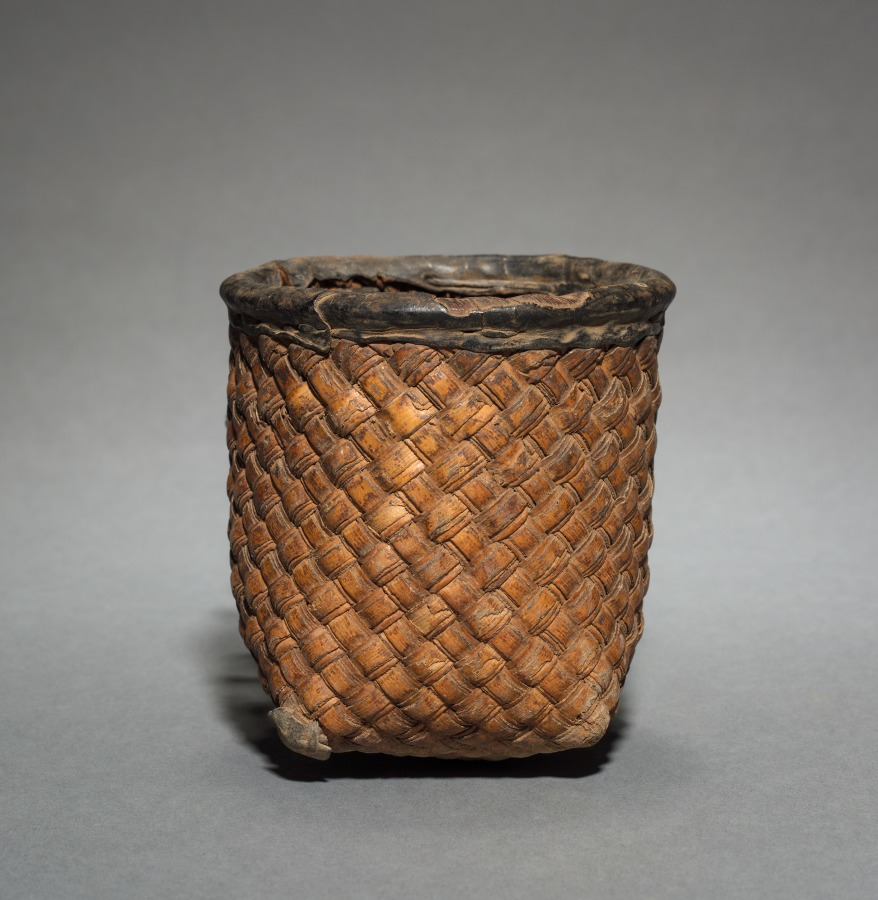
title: One of Ten Nesting Wedding Baskets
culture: Africa, Western Africa, Burkina Faso, Lobi–style maker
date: c 1900s ?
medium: Plant fiber and leather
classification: Vessels